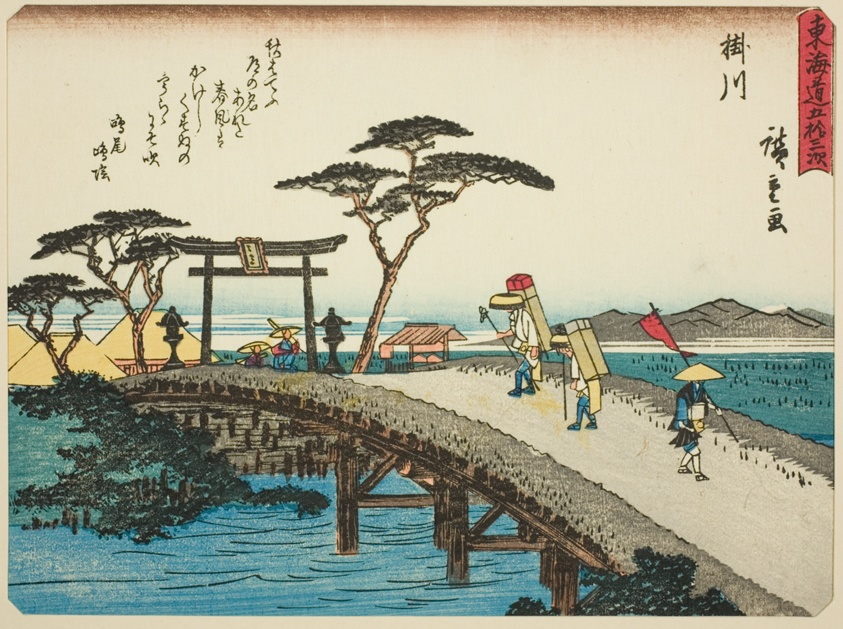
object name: Print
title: Kakegawa, from the series "Fifty-three Stations of the Tokaido (Tokaido gojusan tsugi)," also known as the Tokaido with Poem (Kyoka iri Tokaido)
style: Japanese (culture or style)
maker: Utagawa Hiroshige 歌川 広重; Japanese, 1797-1858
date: c. 1837/42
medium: Color woodblock print; chuban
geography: Japan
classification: woodblock print; print; asian art